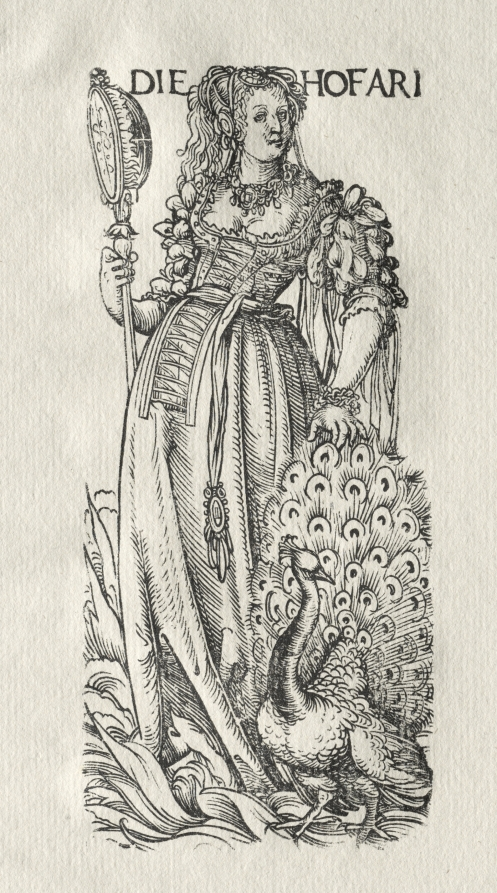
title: The Seven Vices: Pride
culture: Germany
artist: Hans Burgkmair (German, 1473–1531)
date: c. 1510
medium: woodcut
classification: Print